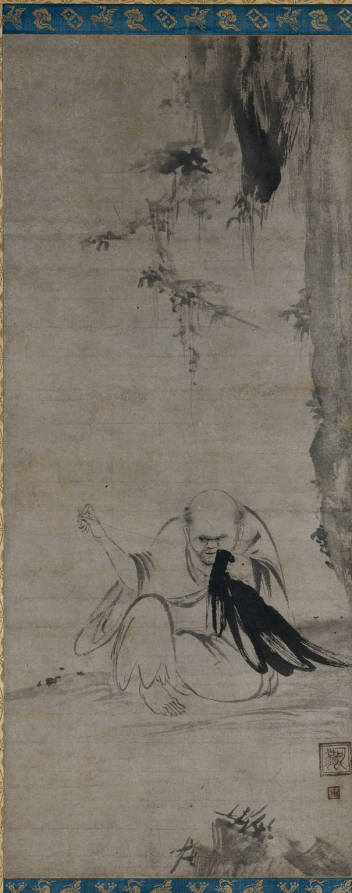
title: Monk Mending Clothes in the Morning Sun (Chōyō Hotetsuzu)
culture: Japan, Nanbokuchō period (1336–92)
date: c. 1350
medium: hanging scroll; ink on paper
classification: Painting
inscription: Seals: Kaō, Ninga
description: This painting illustrates the Zen ideal of cultivating one’s spirit through all moments of life, from the mundane to the marvelous. The monk pictured is simply mending his robes, but it is a meditative activity. A “mending clothes” image would typically form a pair with another on the theme of “reading by moonlight.” While the seals on the painting were added at a later date, similar seals appear on other ink figures and bird-and-flower compositions.